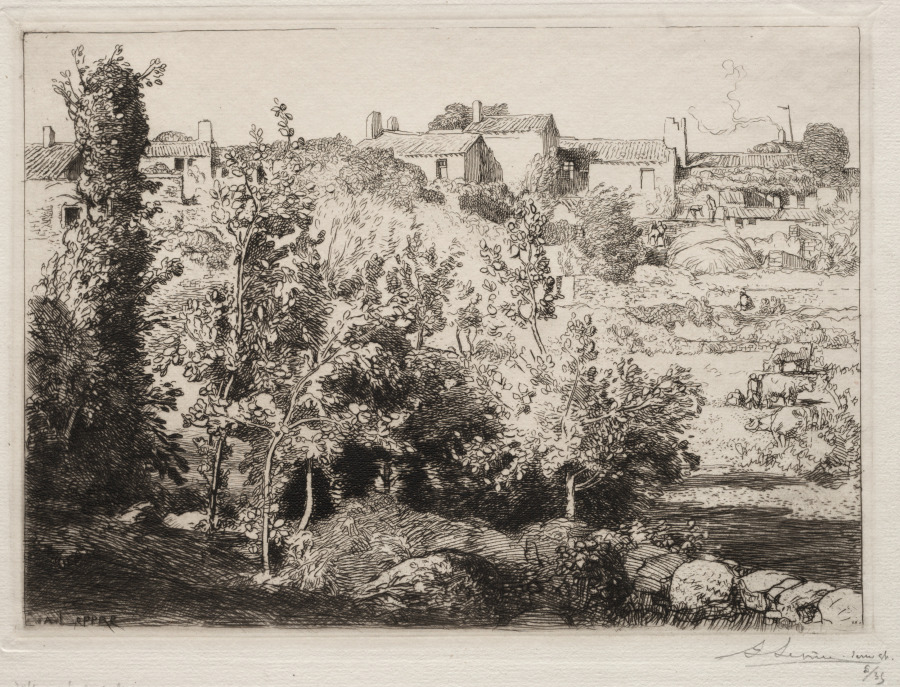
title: Village of Meule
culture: France, 20th century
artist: Auguste Louis Lepère (French, 1849–1918)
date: 1907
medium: etching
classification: Print